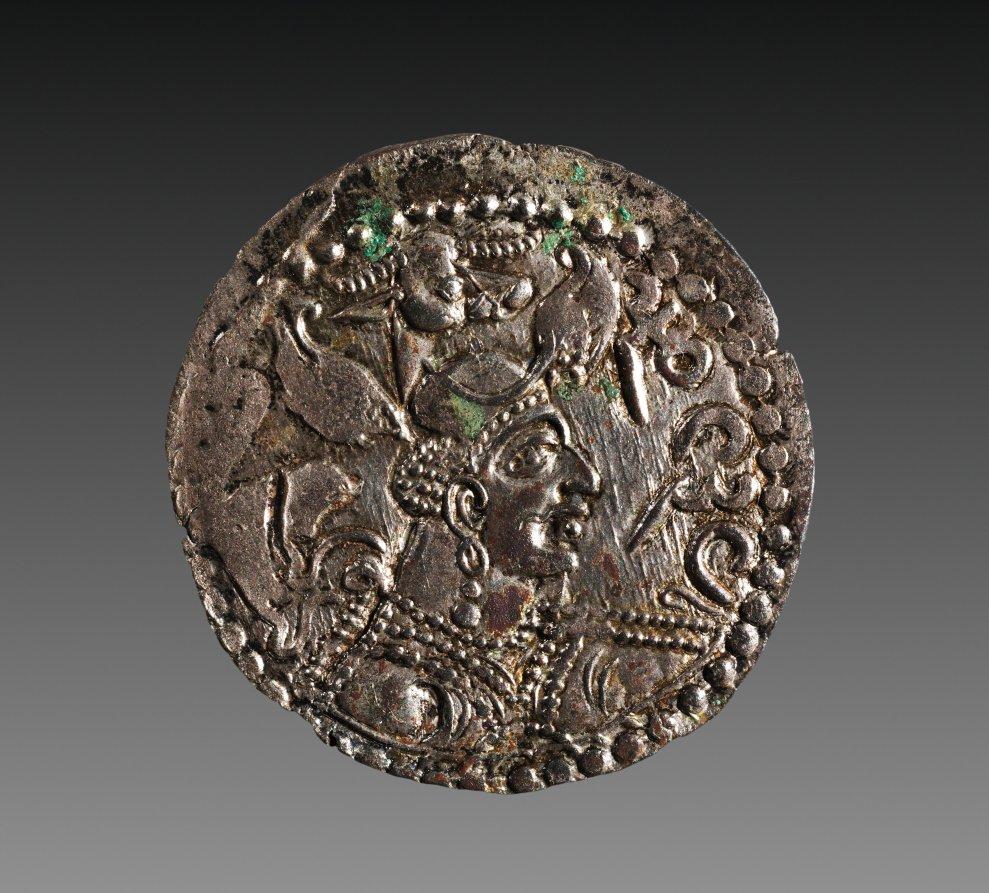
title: Drachm: Bust of Napki Malka with Headdress, Bull's Head (obverse)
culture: Hephtalite, minted in Afghanistan, reign of Napki Malka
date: c. 450–500 CE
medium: silver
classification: Coins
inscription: 𐭭𐭩𐭪𐭩 𐭬𐭫𐭪